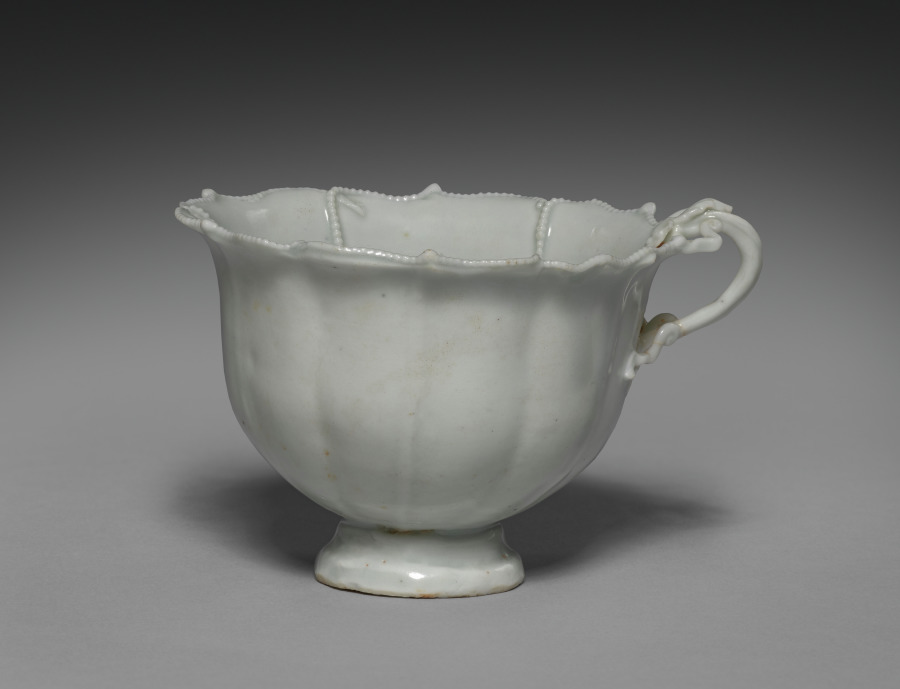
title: Fluted Cup with Dragon Handle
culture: China, Jiangxi Province, Jingdezhen kilns, Yuan dynasty (1271–1368)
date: early 1300s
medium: Glazed porcelain, Qingbai (bluish-white) ware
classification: Ceramic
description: Very thinly potted, the subtly lobed body of this cup is almost translucent. The thin, slightly opaque, light greenish glaze lends a sugary shine. Applied elements, including the handle, beaded borders, and sculptural floret, are constructed and glazed with the same materials as the body, providing a seamless blend of form and decorative embellishment. The result is an evocative reminder of slightly earlier silver cups, also created in the form of flowers. This pristine, natural construction is challenged, however, by the archaic dragon that acts as the handle. Borrowed from the decoration found on much earlier bronzes, this added form illustrates the eclecticism of the Yuan, the attempt to blend present vision with interest in the past.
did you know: Clay beading divides the cup's interior into six foliate panels with a six-petaled flower at the junction of the beaded lines.